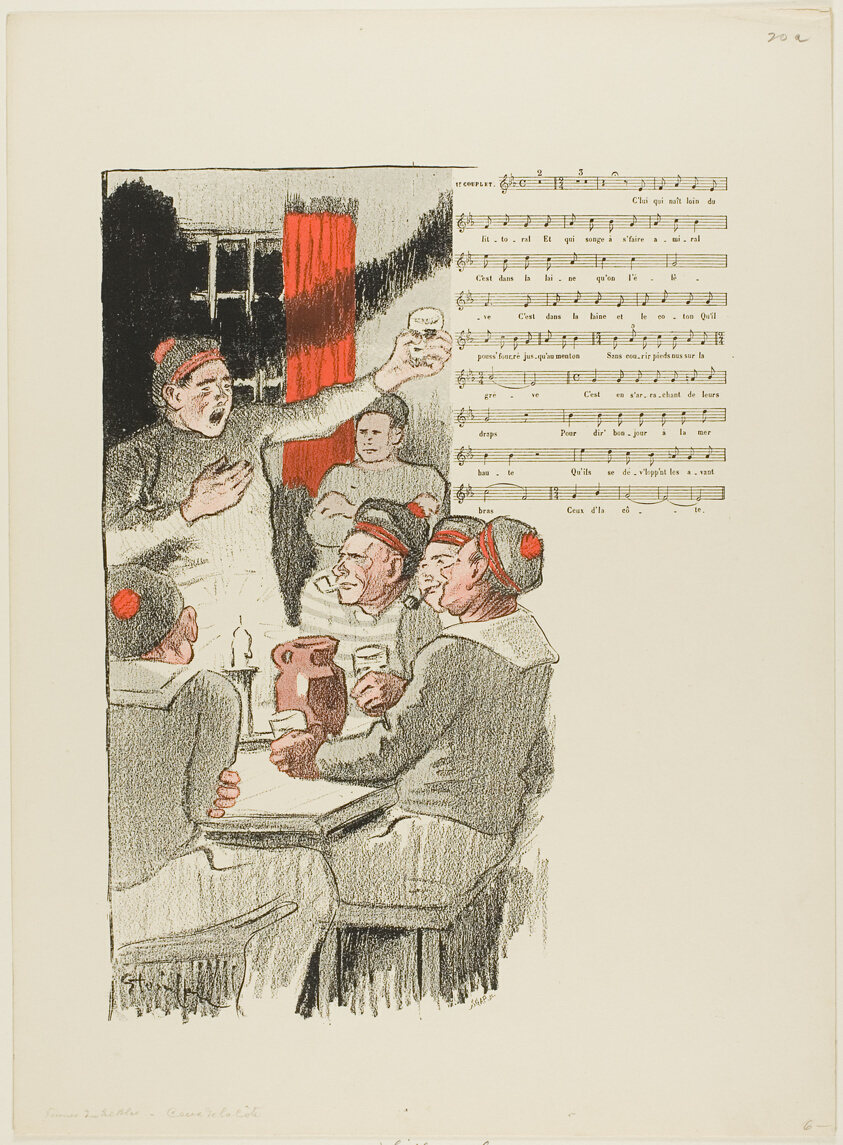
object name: Print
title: To the Navy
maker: engraved by S.G.A.P. (French, active 1892-1900); after Théophile-Alexandre Steinlen (French, born Switzerland, 1859-1923); song by Léon Durocher (French, 1862-1918); published by Gil Blas illustré (French, 1881-1903)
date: published December 4, 1892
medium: Photorelief print in red and black with letterpress music and lyrics on ivory wove paper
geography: France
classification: photorelief; print; prints and drawing